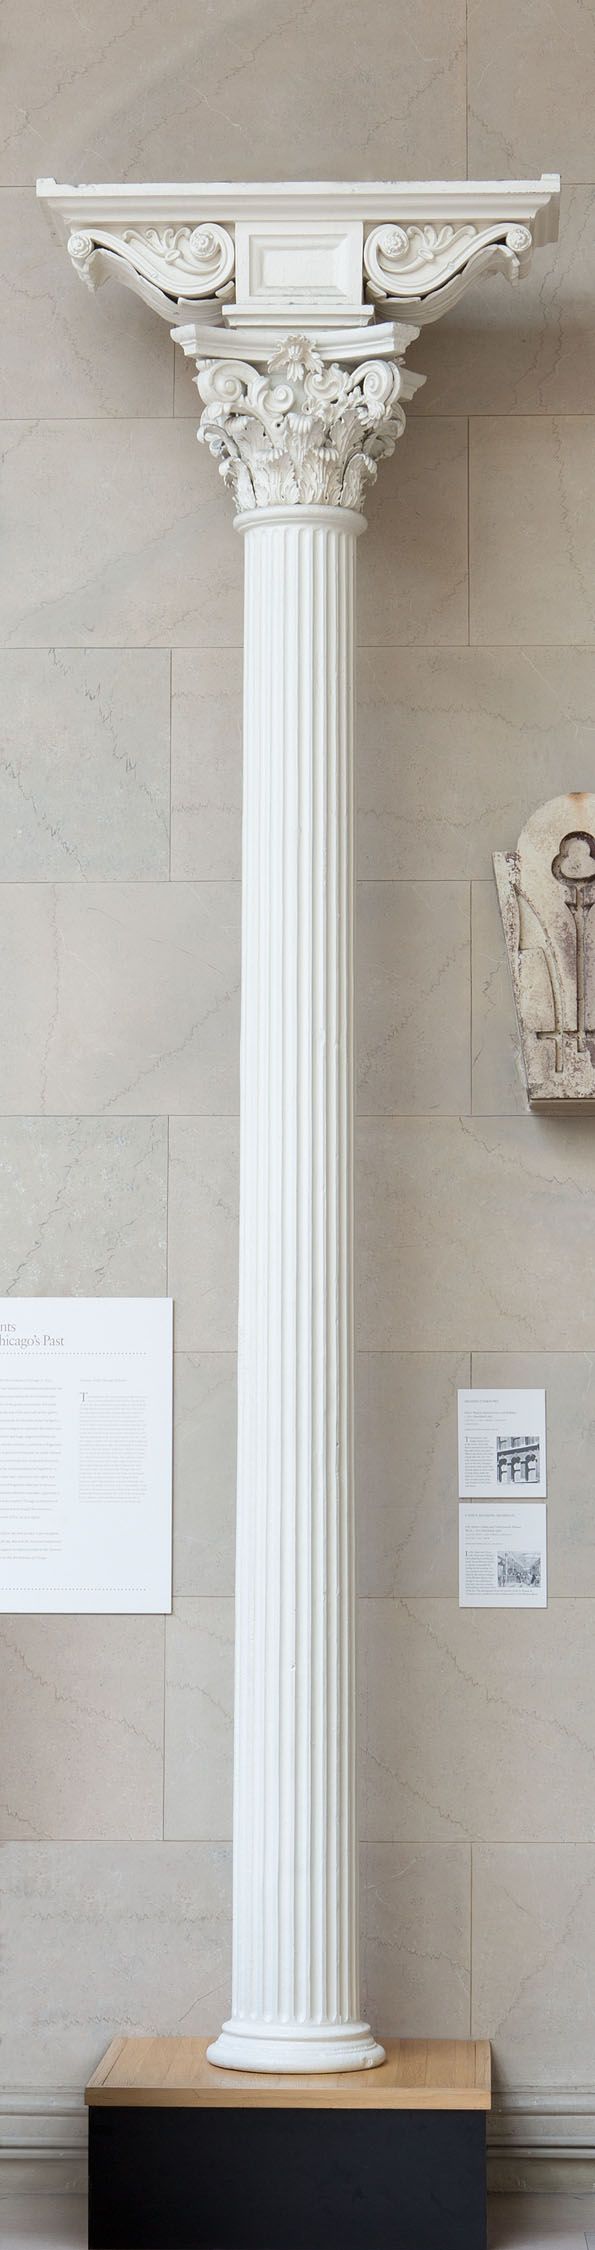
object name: Architectural fragment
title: Interior Column from the Winston Block, Chicago, Illinois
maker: Frederick H. Baumann (American, born Germany, 1826-1921); Edward Baumann (American, born Germany, 1828-1889)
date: 1872 (demolished 1982)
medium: Painted cast iron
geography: Chicago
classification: architectural fragment; architecture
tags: Chicago